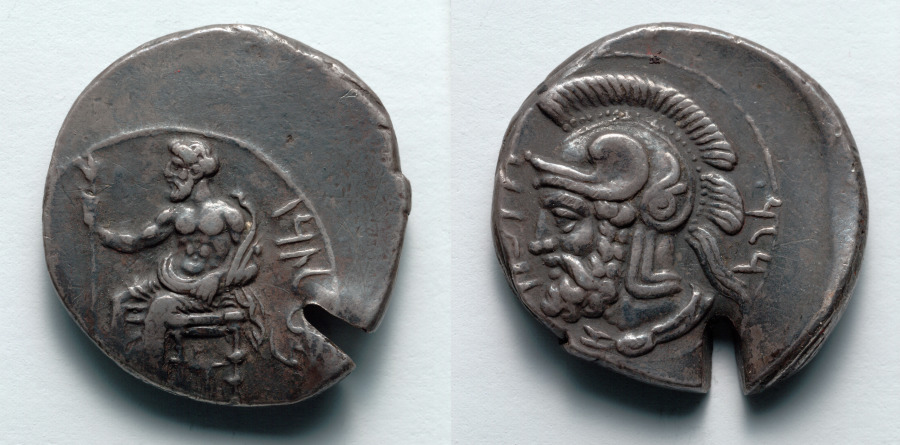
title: Stater: Baal (obverse); Head of Pharnabazos (reverse)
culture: Iran, Achaemenid (550–330 BCE), minted at Tarsos (Kilikia)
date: 379–374 BCE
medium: silver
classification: Coins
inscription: 𐡐𐡓𐡍𐡁𐡆𐡅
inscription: 𐡊𐡋𐡊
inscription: 𐡁𐡏𐡋]𐡕𐡓𐡆]